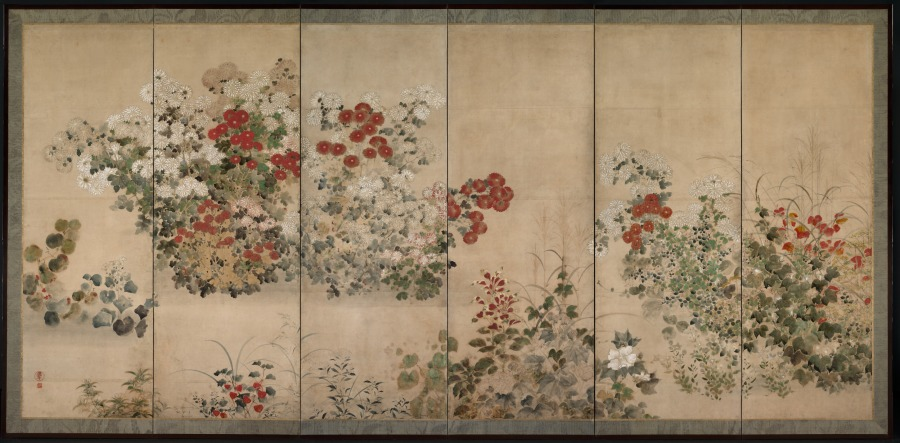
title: Flowers and Grasses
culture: Japan, Edo period (1615–1868)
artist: Kitagawa Sōsetsu (Japanese, active 1639–50)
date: mid-1600s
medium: pair of six-fold screens, ink and color on paper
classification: Painting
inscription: two seals, lower left: "I-nen; Sosetsu"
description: Kitagawa Sōsetsu painted for the Maeda family, powerful rulers of what is present-day Ishikawa Prefecture on the central northern coast of Honshū, Japan’s main island. Screens served as room dividers and backdrops in Maeda grand residences. This composition is considered one of the artist’s masterpieces. Kitagawa Sōsetsu is thought to have been a student of Tawaraya Sōsetsu, who was in turn the student of Tawaraya Sōtatsu, the Kyoto-based master painter regarded as the creator of the style that came to be known as Rinpa. By selecting a painter of this lineage, the Maeda family consciously connected their aesthetics to those of the imperial capital as a means of proclaiming their elevated status.